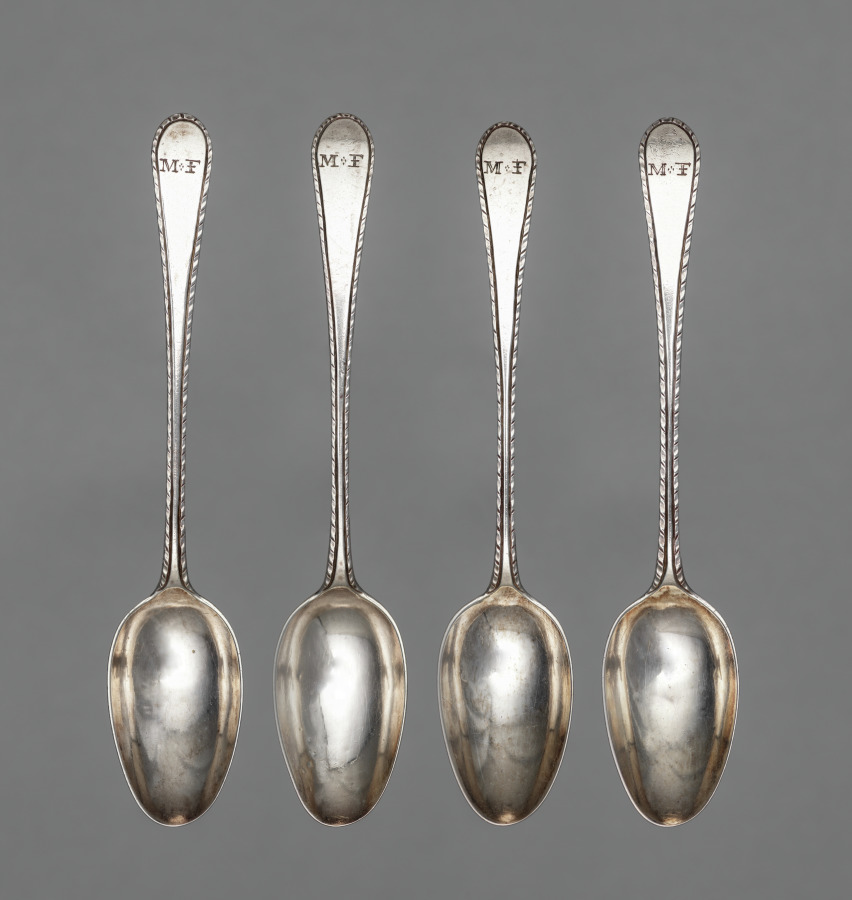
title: Set of Four Teaspoons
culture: America, New Hampshire, Portsmouth, 18th century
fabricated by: Samuel II Drowne (American, 1749–1815)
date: c. 1770–1780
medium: silver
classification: Silver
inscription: engraved "M+F" in block letters on top of handle end, and "D.F.Wentworth" (later) in script on back of handle end.